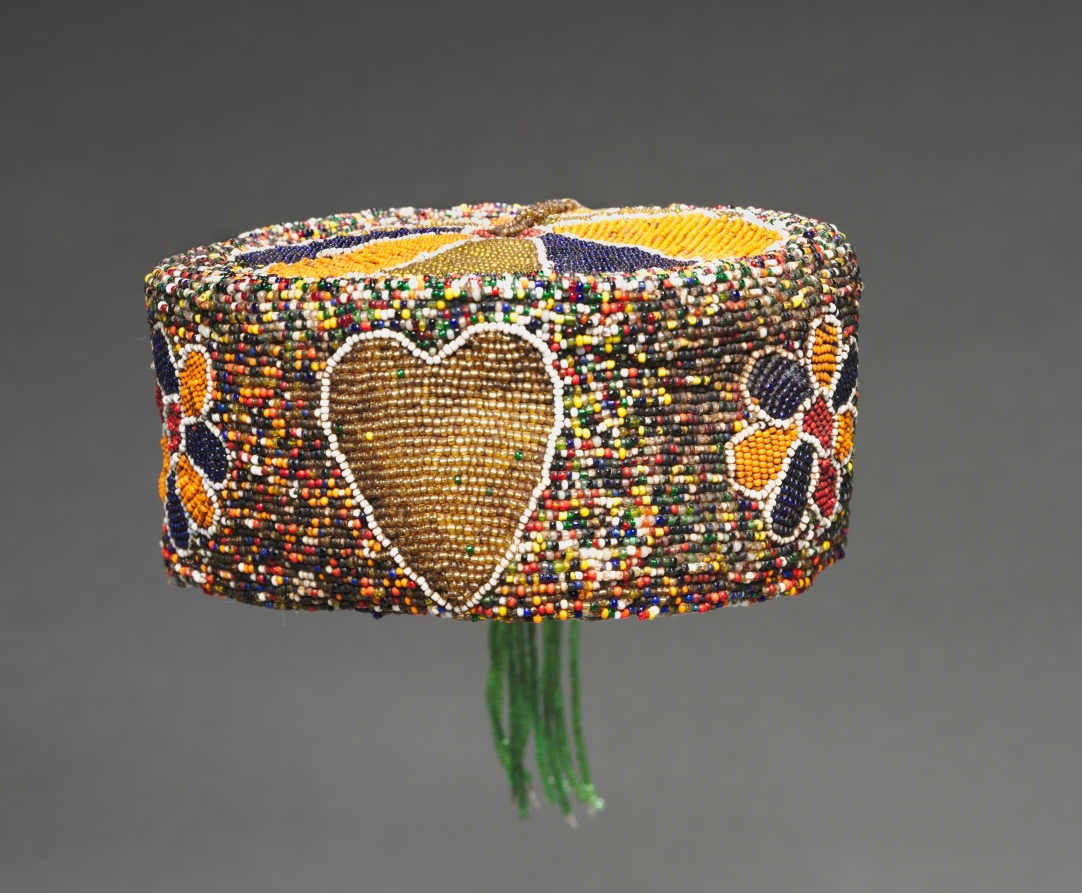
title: Coronet (oríkògbófo)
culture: Africa, West Africa, Nigeria, Yorùbá-style maker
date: 1900s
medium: Cloth, glass beads, and thread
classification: Garment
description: Like the rare conical crown (ade), the coronet (oríkògbófo) may only be worn by a king descended from Oduduwa, the first king of the Yorùbá. While the crown is reserved for special occasions, the coronet may be used by the king for less formal public events and when entertaining non-Yorùbá visitors. It signifies wealth rather than royal status.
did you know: The beads on this sculpture were imported, likely from Venice or Bohemia (now called the Czech Republic).